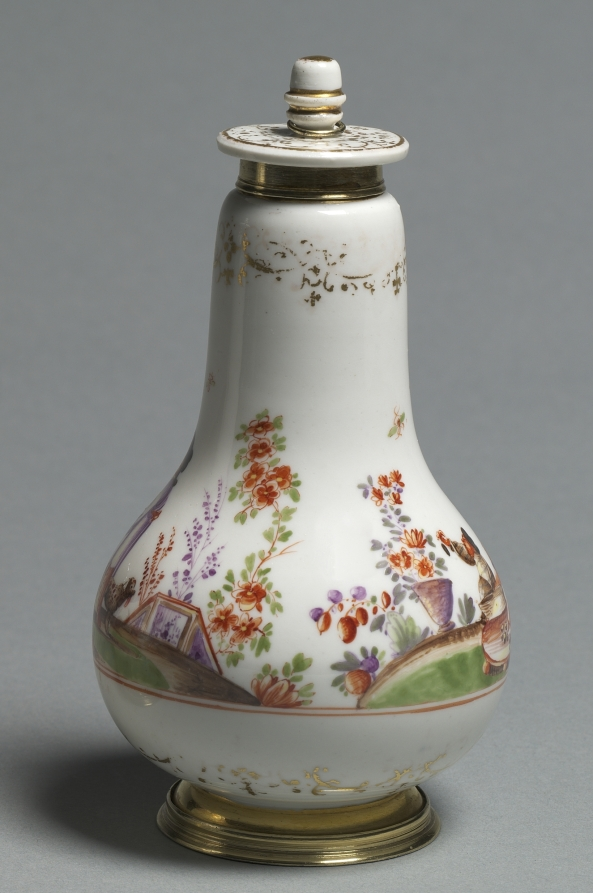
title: Covered Flask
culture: Germany, Meissen, 18th century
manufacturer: Meissen Porcelain Factory (German, est. c. 1710)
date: c. 1720–1723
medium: porcelain with gilt metal mounts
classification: Ceramic